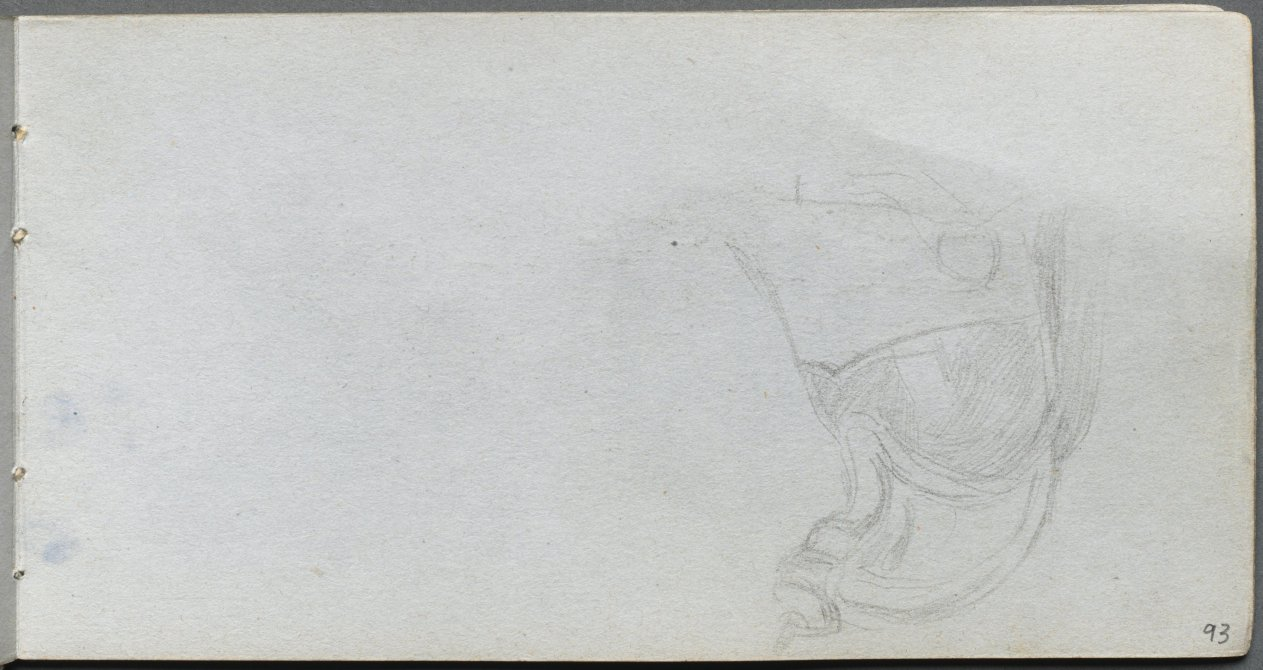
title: Sketchbook, page 93: Study of a Saddle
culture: France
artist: Ernest Meissonier (French, 1815–1891)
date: c. 1860s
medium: graphite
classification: Bound Volume